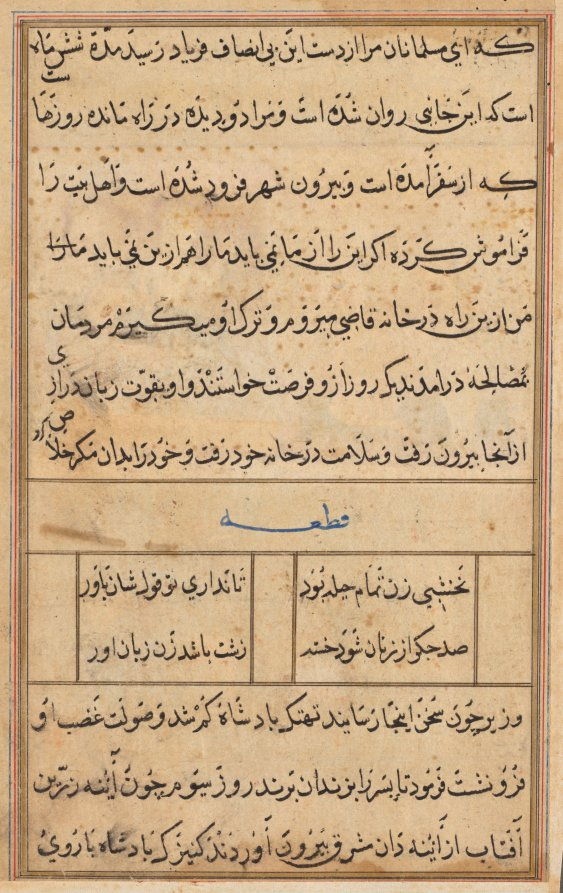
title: Page from Tales of a Parrot (Tuti-nama): text page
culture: Mughal India, court of Akbar (reigned 1556–1605)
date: c. 1560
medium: gum tempera, ink, and gold on paper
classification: Painting